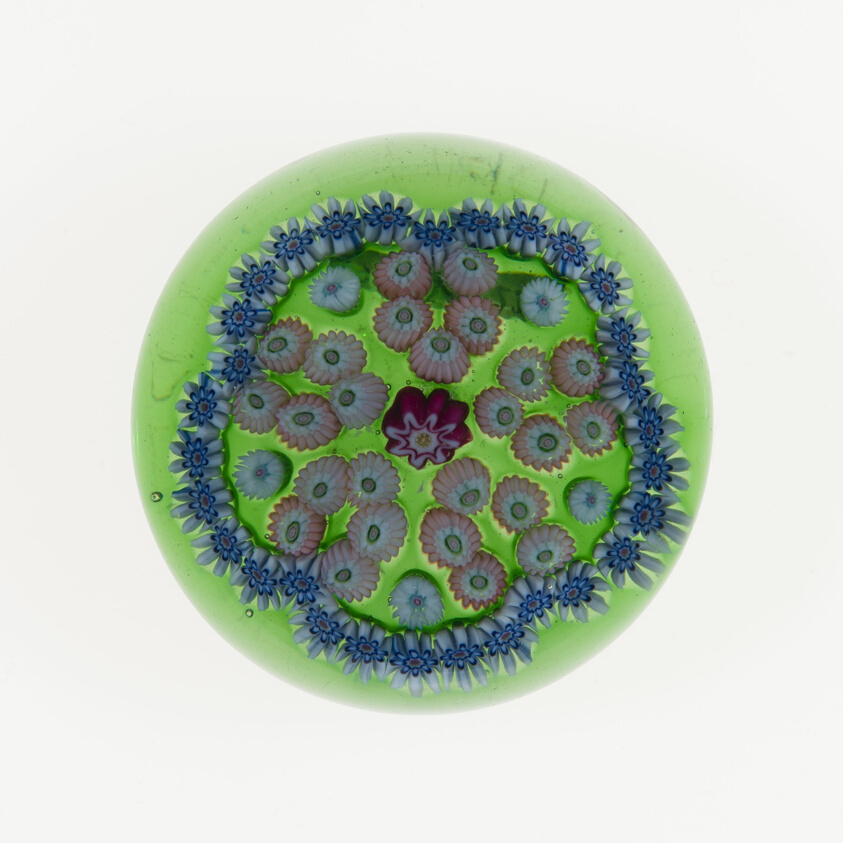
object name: Glass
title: Paperweight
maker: Clichy Glassworks (Cristalleries de Clichy); Clichy, France, 1837-1885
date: c. 1845/60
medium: Glass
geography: Clichy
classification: paperweight; glass